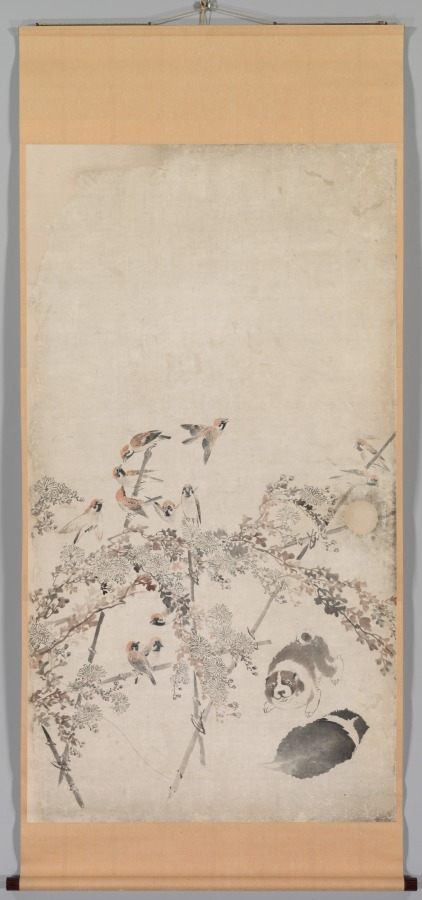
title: Puppies, Sparrows, and Chrysanthemums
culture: Japan, Edo period (1615–1868)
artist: Nagasawa Rosetsu (Japanese, 1754–1799)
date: c. 1792–94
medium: Fusuma panel remounted as a hanging scroll; ink and slight color on paper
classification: Painting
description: These paintings were originally mounted as sliding doors (fusuma) used inside a building. The circular areas on the paintings’ paper surfaces are traces of the former positions of the door pulls (hikite). A flock of sparrows gathers on a trellis supporting flowering chrysanthemum. Below is a litter of puppies, some cavorting, others napping. The tender story created by the curious puppy peering up and tilting its head to listen to the bird’s insistent call (in the leftmost part of the composition) is characteristic of Nagasawa Rosetsu’s paintings, which often use animals to illustrate the human condition.